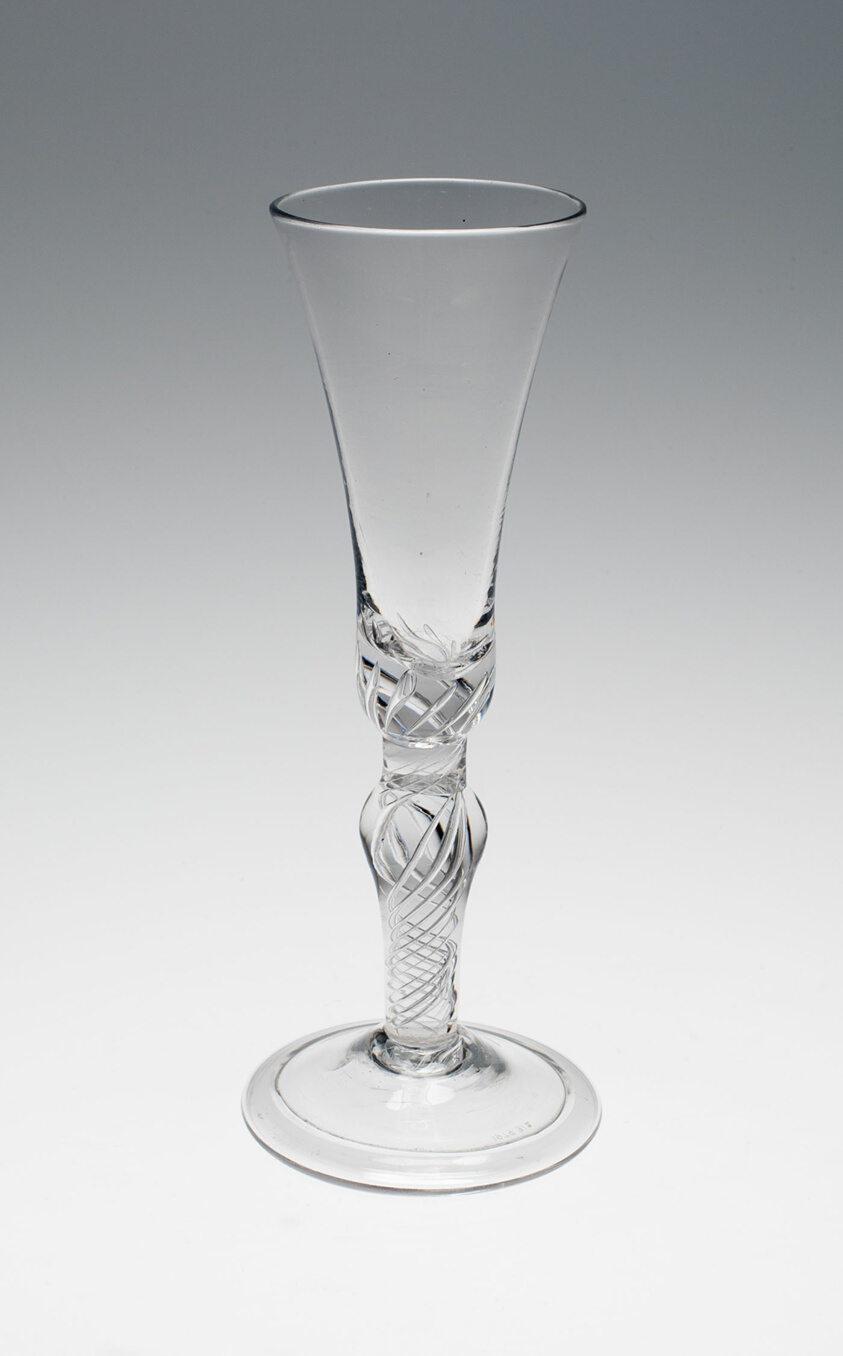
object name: Glass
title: Wine Glass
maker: England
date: c. 1750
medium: Glass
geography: England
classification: drinking vessel; glass; european decorative arts